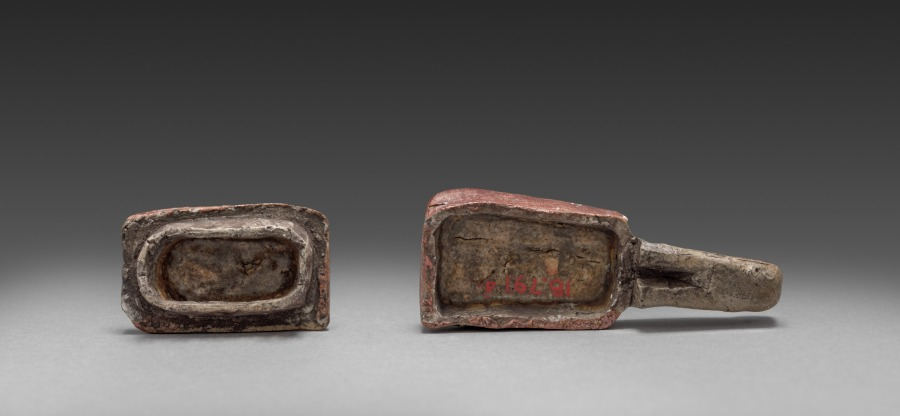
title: Ink Box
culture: Japan, Edo period (1615–1868)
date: early to mid-1800s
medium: pottery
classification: Ceramic